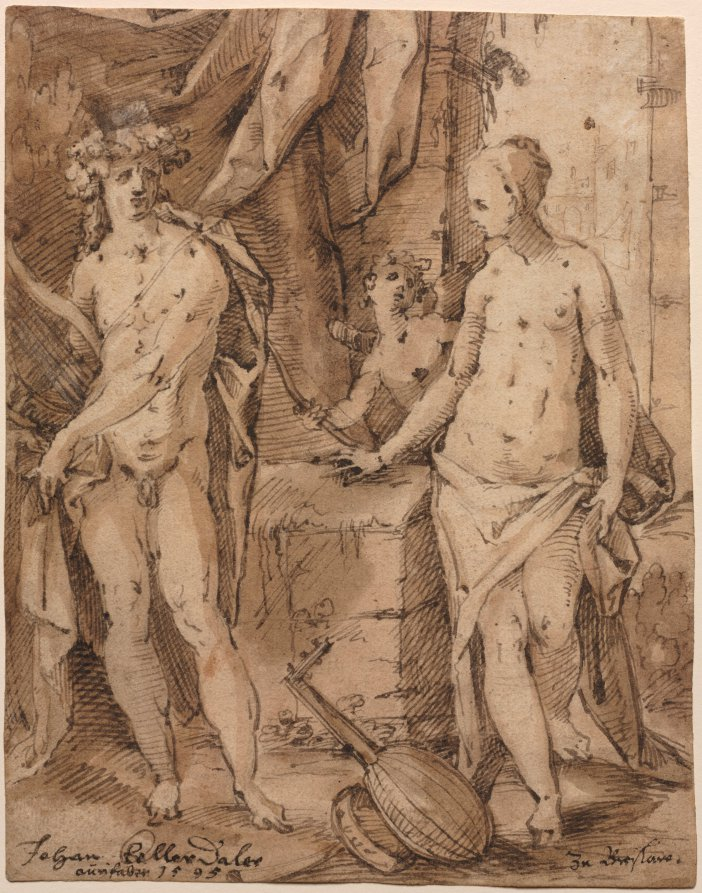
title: Apollo with Erato and Cupid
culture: Germany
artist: Johann Kellerthaler (German, c. 1560/2–1611)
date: 1595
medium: pen and black ink and brown wash heightened with white gouache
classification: Drawing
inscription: Inscribed lower left in pen and black ink: "Johan KellerDaler aurifaber1595" lower right in pen and black ink: "Zu Breslave"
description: In this visual allegory of poetry, Apollo holds his attribute, the kithara, a stringed instrument used in the recitation of epic poems. Erato, the Muse of lyric poetry, appears with a lute and tambourine at her feet. Lyric poetry typically expresses an idea or emotion, such as love, through short, musical, and rhythmic verse. Kellerthaler lived in Dresden, where he regularly worked for members of the Saxon court as a painter, sculptor, printmaker, and goldsmith.